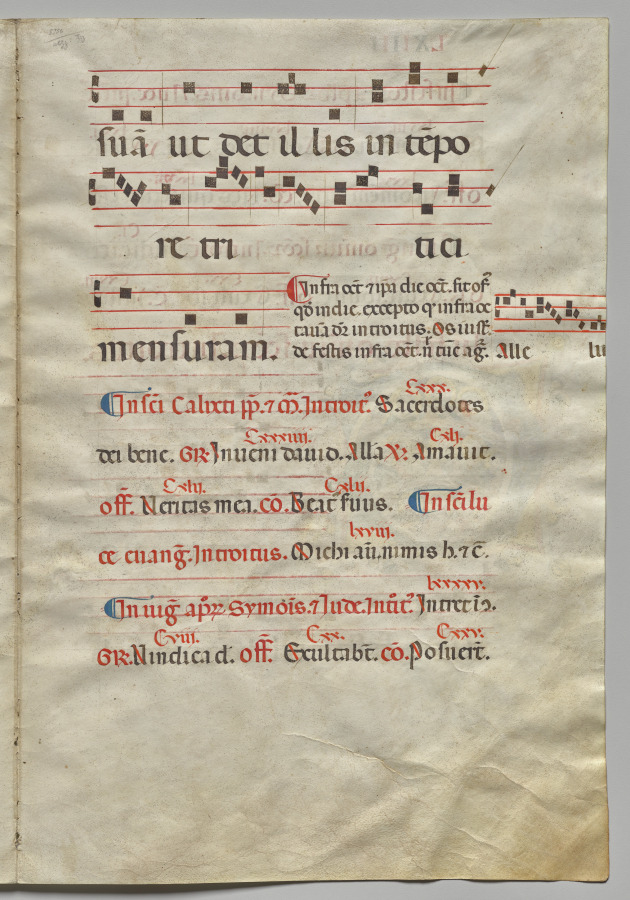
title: Bifolio from a Gradual: Music and Text (verso)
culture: Italy, Siena(?)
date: c. 1300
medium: Ink, tempera, and gold on vellum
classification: Manuscript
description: The large decorated initial G introduces the text, Gaudeamus omnes in Domino (Let us rejoice in the Lord). It is the beginning of the opening prayer, or introit, of the Mass for the Feast of All Saints (November 1). The figures within the initial include Christ, the Virgin Mary, and various saints.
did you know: Words written in red ink, called rubrics, indicate titles and chapter headings that are not part of a manuscript’s main text.